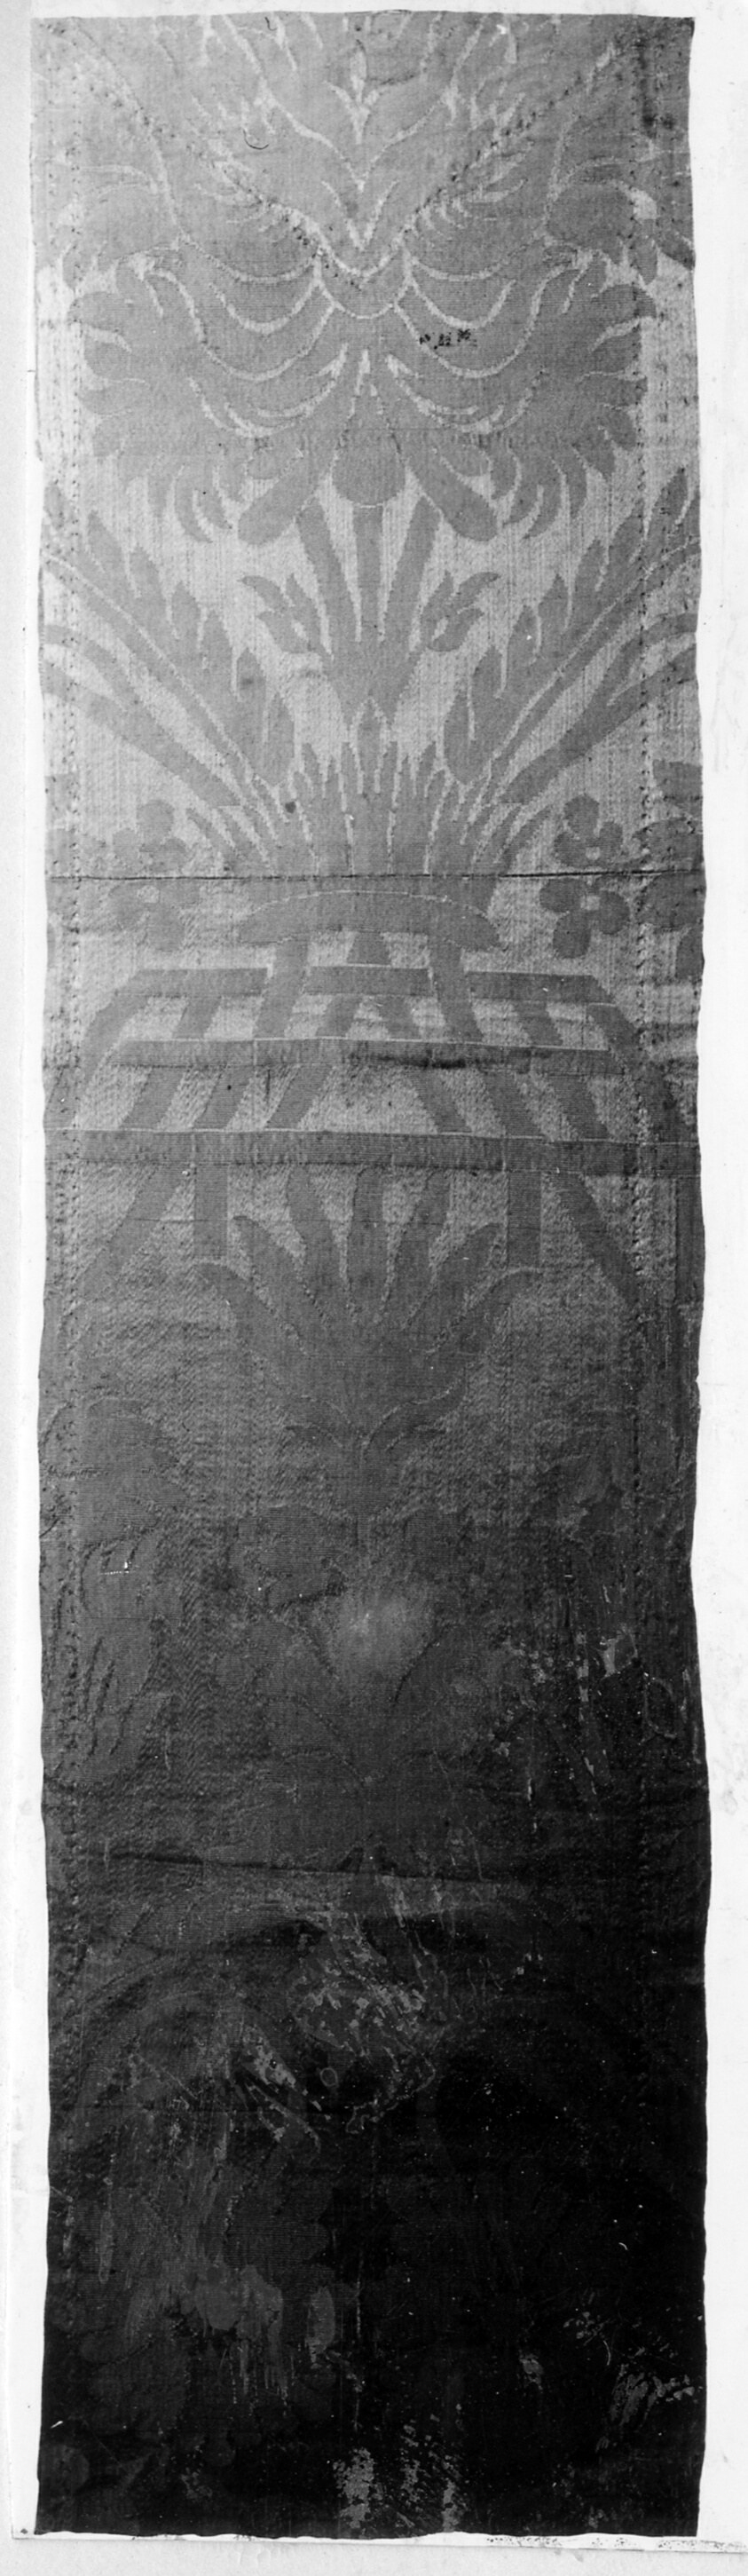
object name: Textile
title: Fragment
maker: Italy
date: 17th century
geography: Italy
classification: textile; weaving